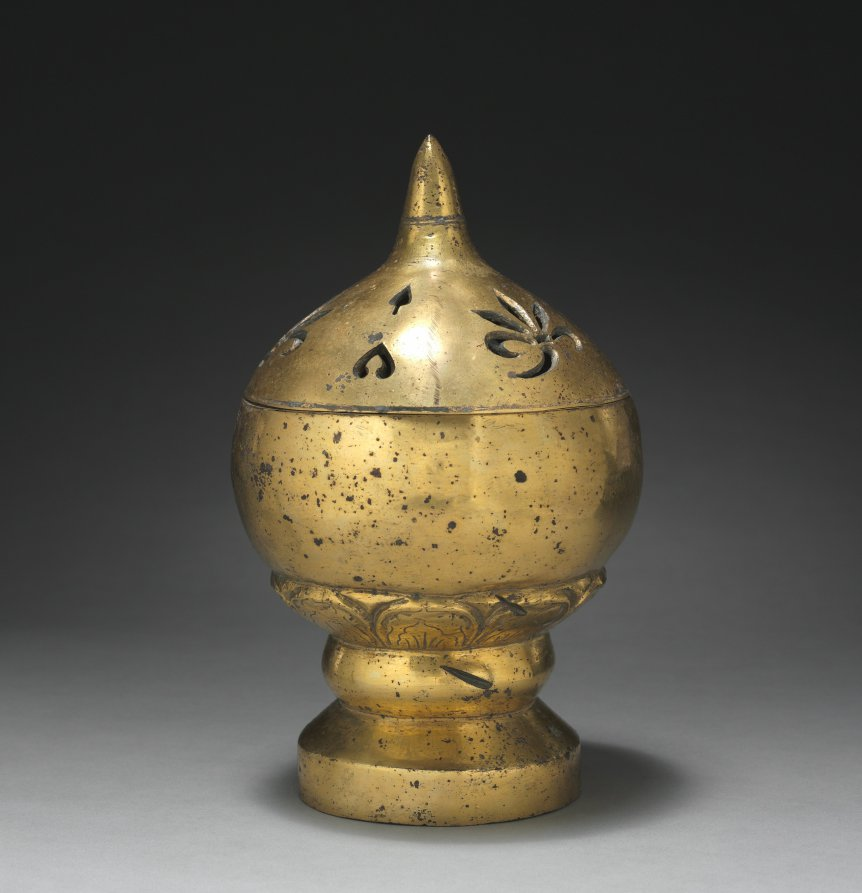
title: Censer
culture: China, Tang dynasty (618–907)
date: early 600s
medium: gilt bronze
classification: Metalwork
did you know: The censor's base has a band of incised lotus-petal motifs, while the pointed lid has openwork floral motifs to release the incense's aroma.